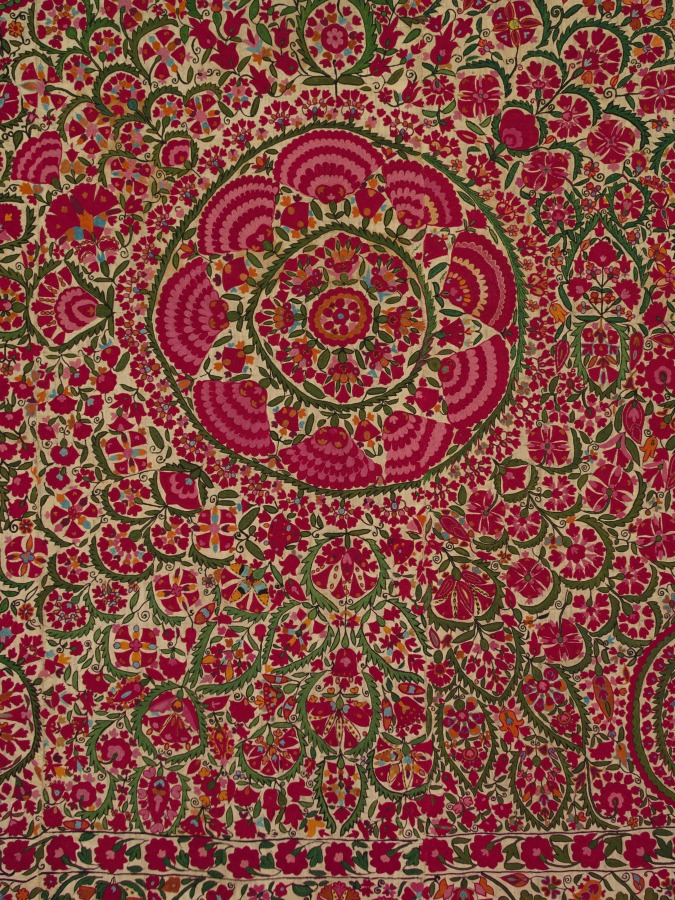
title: Curtain or bedcover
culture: Tajikistan, Ura Tube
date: early 1800s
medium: plain weave: cotton; embroidery: silk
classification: Embroidery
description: Known as suzani, embroideries with elaborate floral decoration from Central Asia were a significant part of a bride’s dowry and were ceremoniously displayed on special occasions. Women embroidered suzani, mothers passing their skills on to their daughters. Floral and foliate motifs generally dominate, emboldened with several shades of red and multiple borders, perhaps conveying cosmological, medicinal, or fertility associations. However, few display a more bountiful blossoming garden than seen here. Flora radiates from the central fanlike bouquet, a design echoed in the corners of the field and in the wide border, characteristic of work from Bukhara, Uzbekistan. Patterns were drawn on several loosely joined cotton cloths and then embroidered in chain stitch.